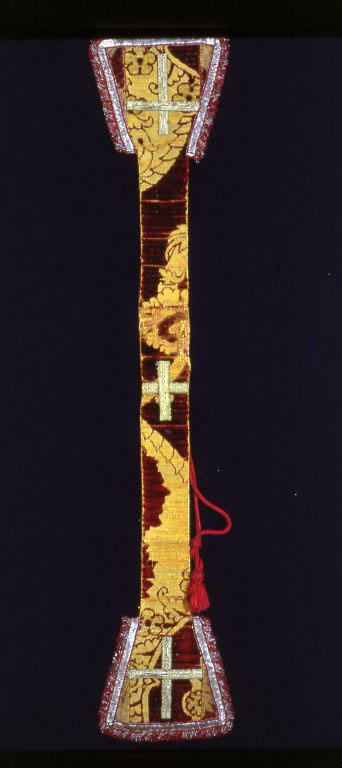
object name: Textile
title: Stole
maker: Spain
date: 15th century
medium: Silk, velvet; cut, voided; additional brocading wefts in gilt strip (wound around silk fiber core) forming loops where required; gilt galloon trim and crosses; two attached silk cords, knotted and fringed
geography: Spain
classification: textile; weaving - velvet; costume; dress (garment); clothing